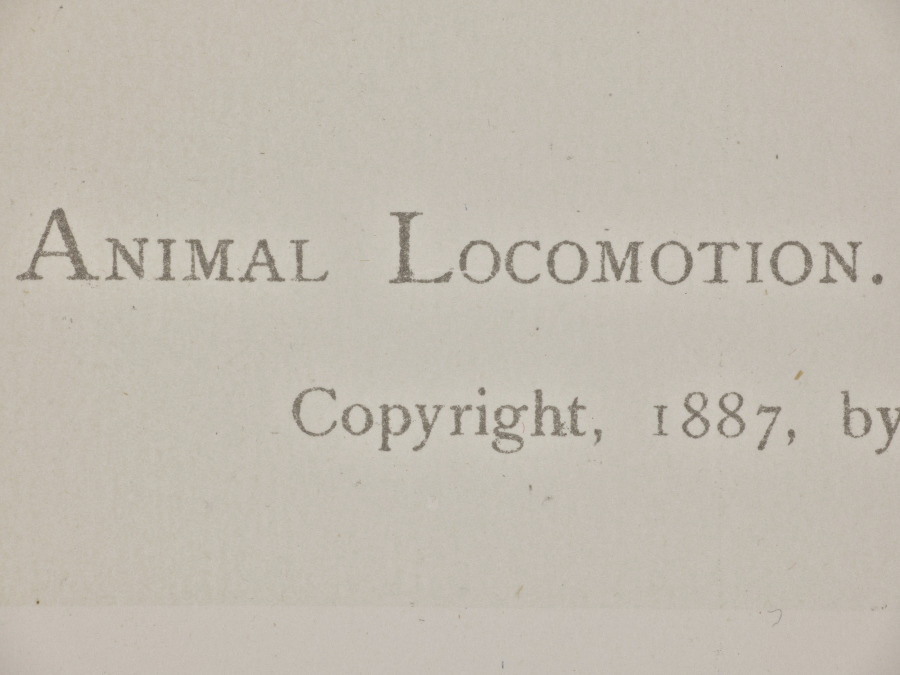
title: Emptying a Bucket of Water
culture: America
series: Animal Locomotion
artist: Eadweard J. Muybridge (American, 1830–1904)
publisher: University of Pennsylvania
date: 1887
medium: collotype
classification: Photograph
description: Eadweard J. Muybridge initially used horses to capture motion as separate slices of time faster than the human eye could perceive them, then moved on to study other animal and human movements. Everyday activities, like emptying a bucket of water, were broken down and sequenced back-to-back. This series was commissioned by the University of Pennsylvania and intended to diagnose dysfunction in human movement by allowing each consecutive action to be studied in isolation. The university’s desire for distribution called for the use of collotype. The process had been recently improved to the point where editions of up to 1,000 were possible, making it an attractive option for publishers.